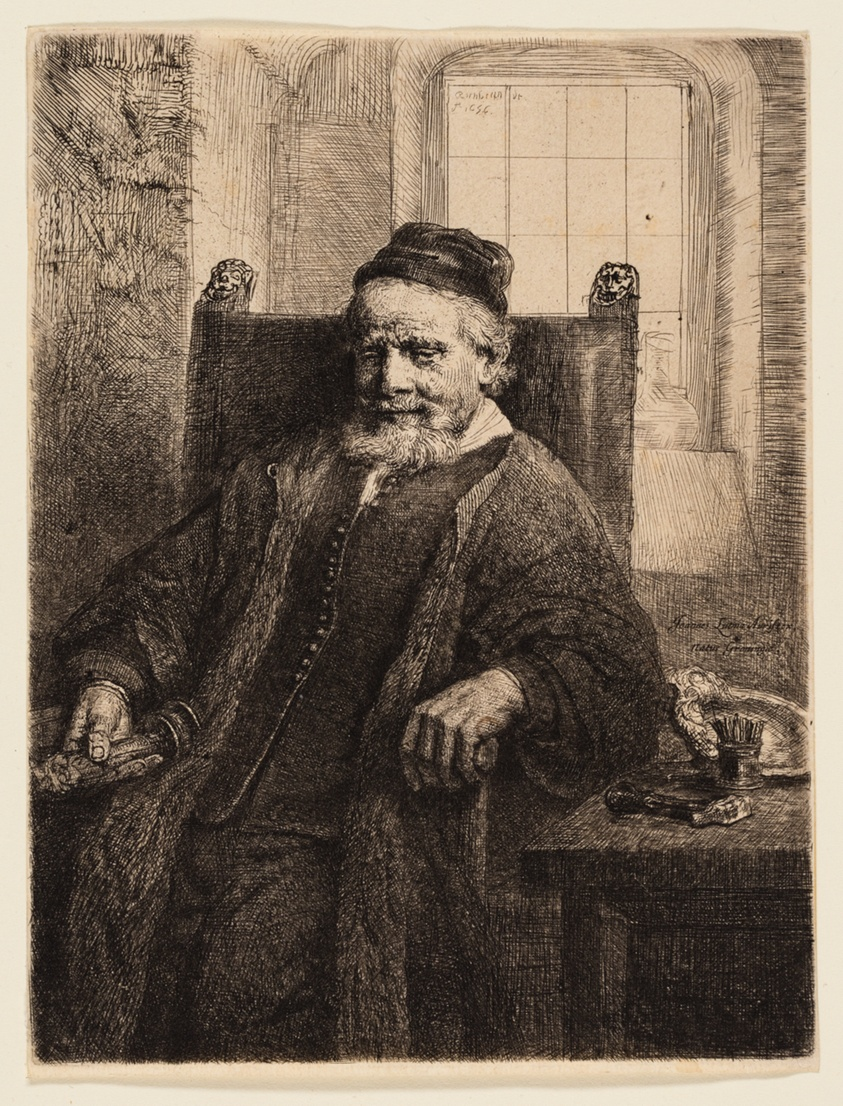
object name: Print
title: Jan Lutma, Goldsmith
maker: Rembrandt van Rijn (Dutch, 1606-1669)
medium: Etching on paper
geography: Holland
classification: etching; print; prints and drawing; paper